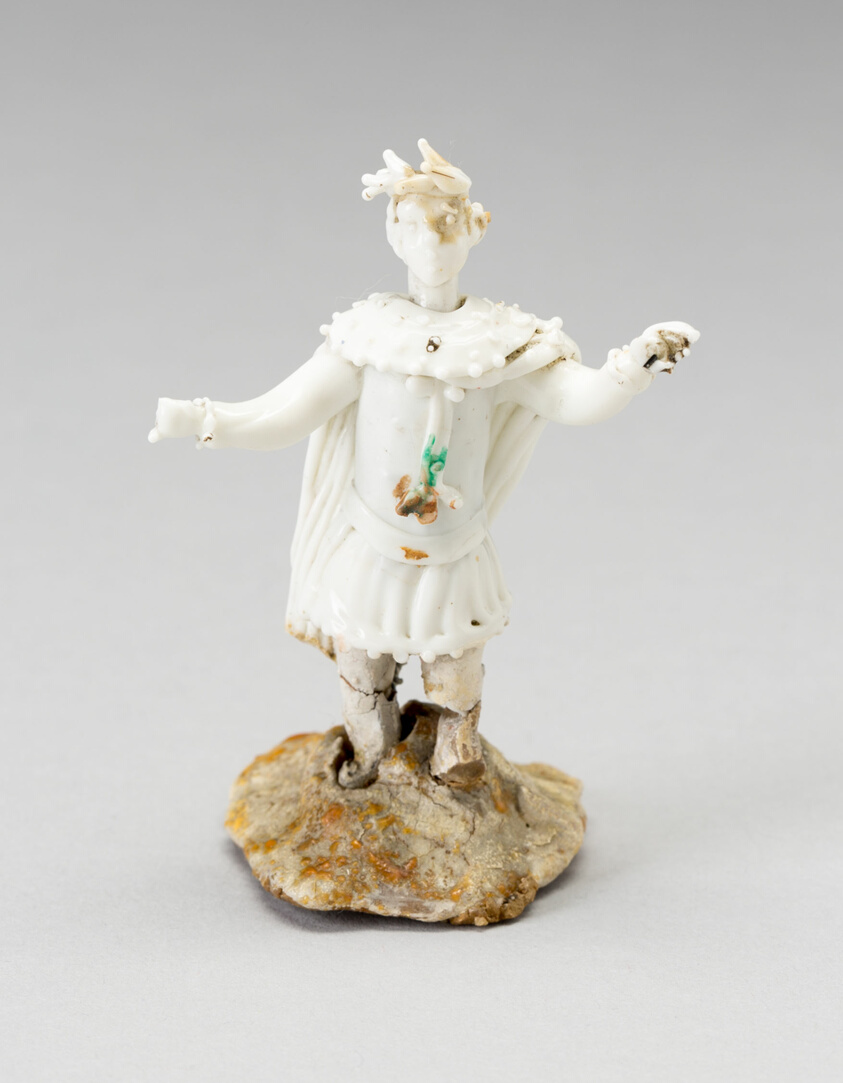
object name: Glass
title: Boy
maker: Nevers, France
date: Early 18th century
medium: Glass; lampwork (verre de Nevers), metal armature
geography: France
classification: decorative object/ornament; lampwork; glass; european decorative arts